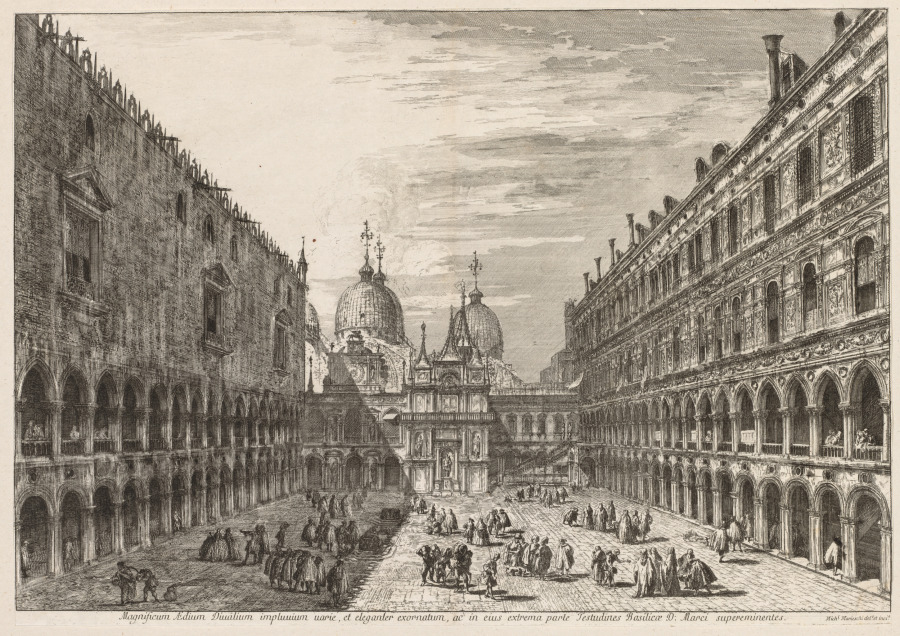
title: Views of Venice: The Courtyard of the Ducal Palace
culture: Italy, 18th century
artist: Michele Marieschi (Italian, 1710–1743)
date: 1741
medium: etching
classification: Print